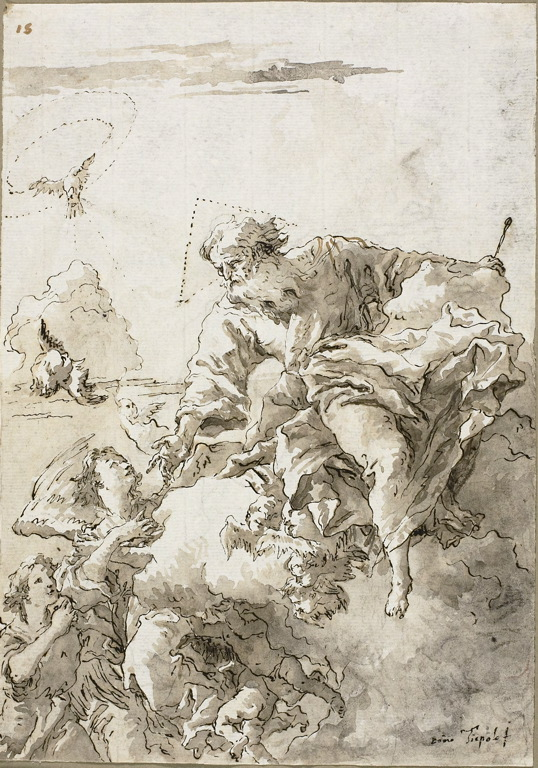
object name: Drawing and Watercolor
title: God the Father Supported by Angels in the Clouds, I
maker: Giovanni Domenico Tiepolo (Italian, 1727-1804)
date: c. 1759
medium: Pen and brown ink, and brush and brown and gray washes, with traces of red chalk, over traces of black chalk, on ivory laid paper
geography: Italy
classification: pen and ink drawings; drawings (visual works); prints and drawing